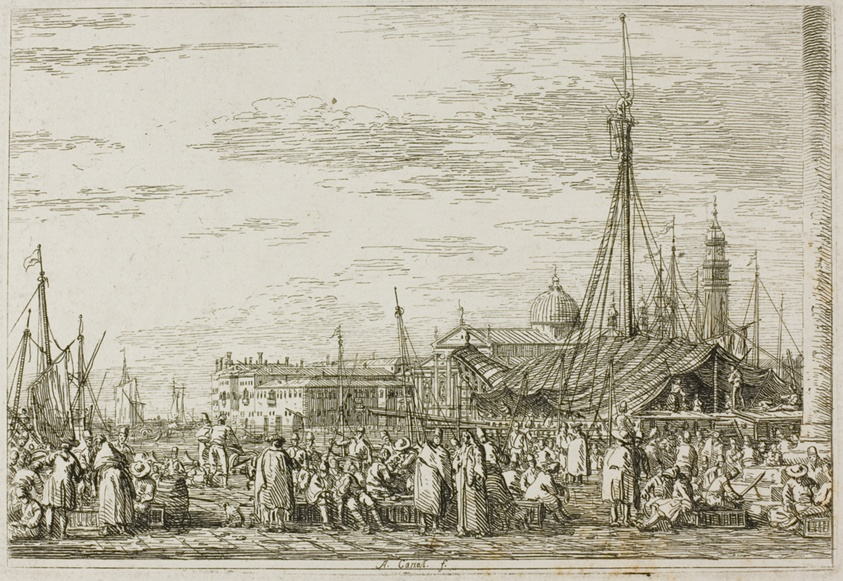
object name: Print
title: The Market on the Molo, from Vedute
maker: Canaletto (Italian, 1697-1768)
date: 1735/44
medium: Etching in black on ivory laid paper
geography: Italy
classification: etching; print; prints and drawing